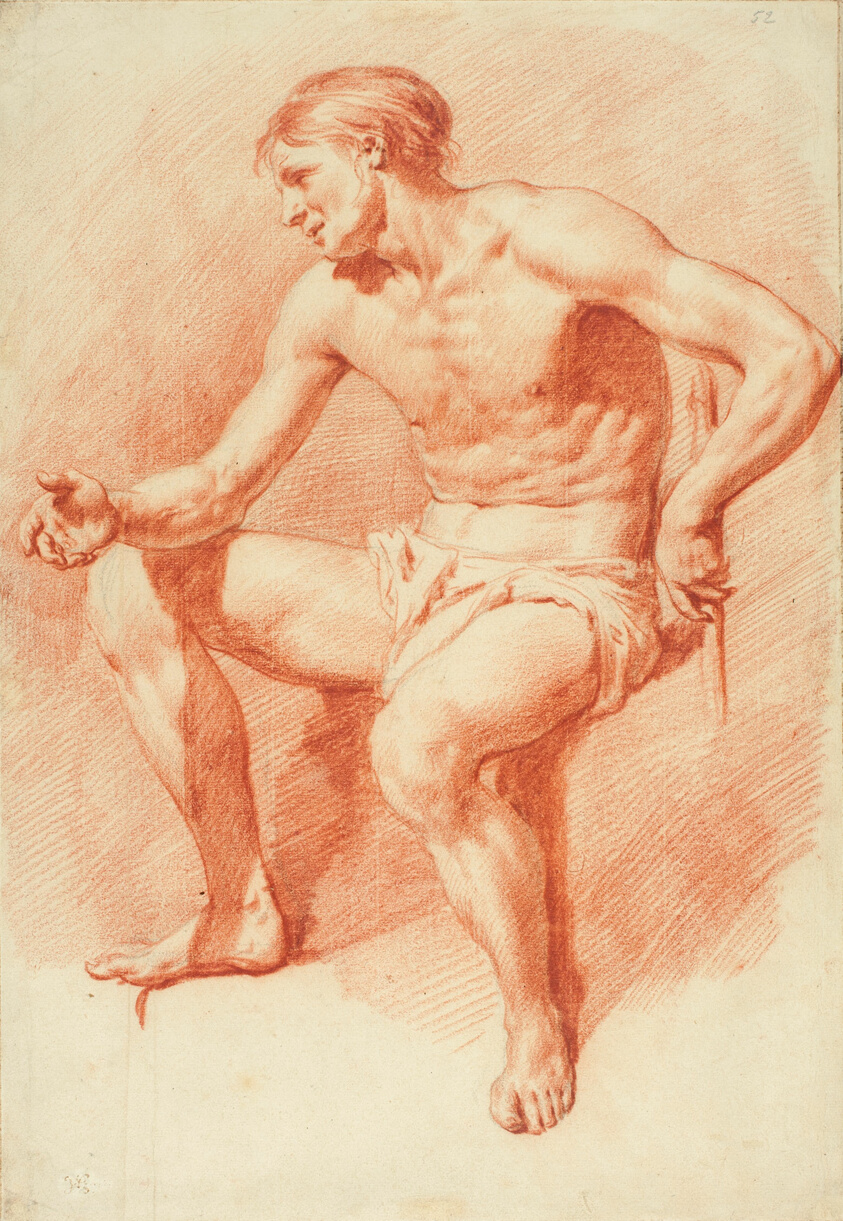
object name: Drawing and Watercolor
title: Study of a Male Nude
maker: Adriaen van de Velde (Dutch, 1636-1672)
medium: Red chalk, over traces of charcoal, ruled in pen and brown at edges, on cream laid paper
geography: Holland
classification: chalk; drawings (visual works); prints and drawing